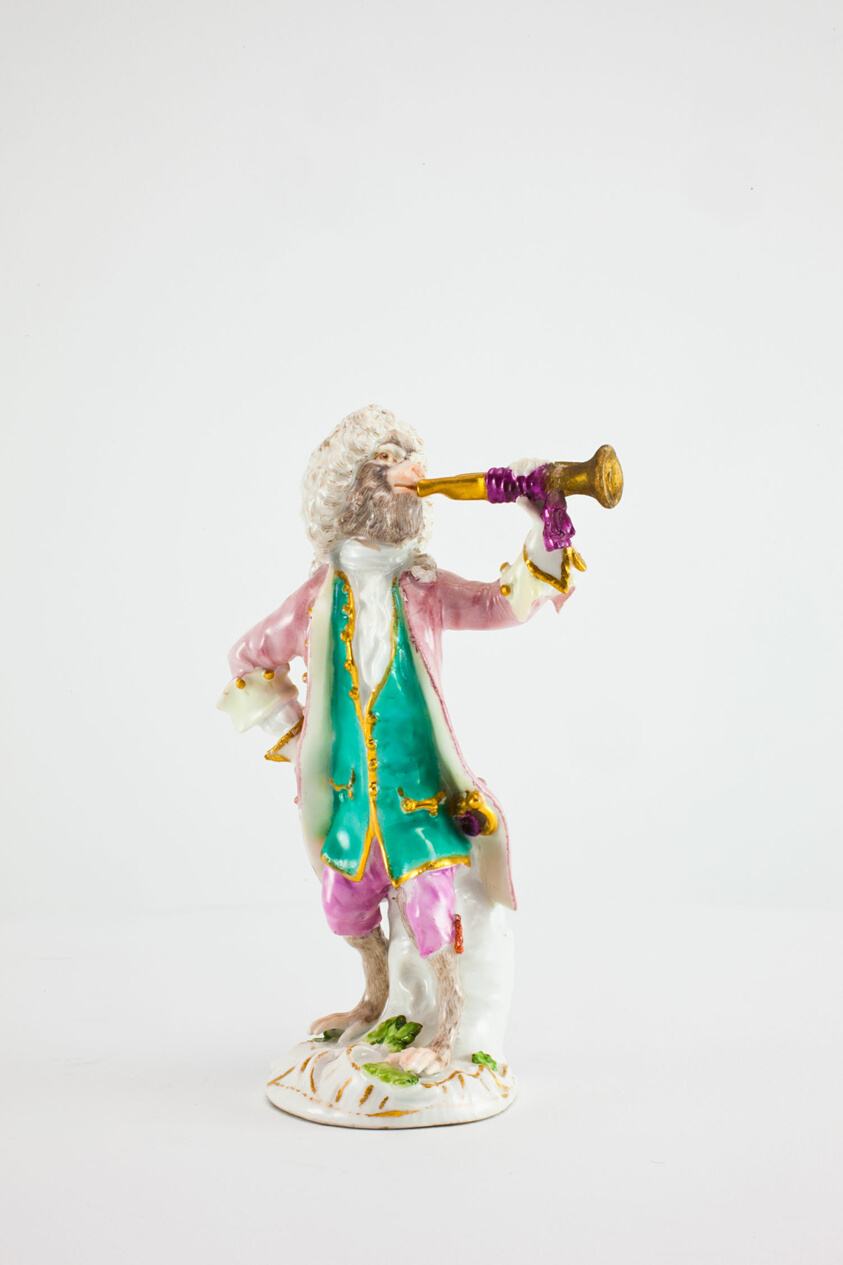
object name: Ceramics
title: Trumpeter for the Monkey Band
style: Rococo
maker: Meissen Porcelain Manufactory; German, founded 1710; After a model of Kändler or Reinicke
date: c. 1765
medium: Hard-paste porcelain, polychrome enamels, and gilding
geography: Meissen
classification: sculpture; ceramics; porcelain; european decorative arts